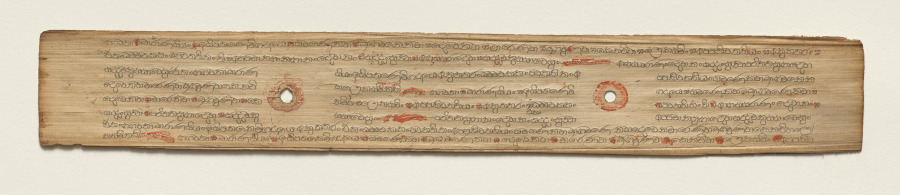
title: Leaf from a Buddhist Manuscript (verso)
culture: Sri Lanka, Singhalese, Late 17th century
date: c. 1700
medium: fiber paper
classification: Manuscript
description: Palm leaf material is still used for manuscripts in Sri Lanka. The palm leaves are prepared first by boiling them, drying them in the sun, and then rubbing them with oils. Scribes then use a metal stylus to incise the text. Then charcoal powder is wiped across the pages, filling in only the inscribed lines.